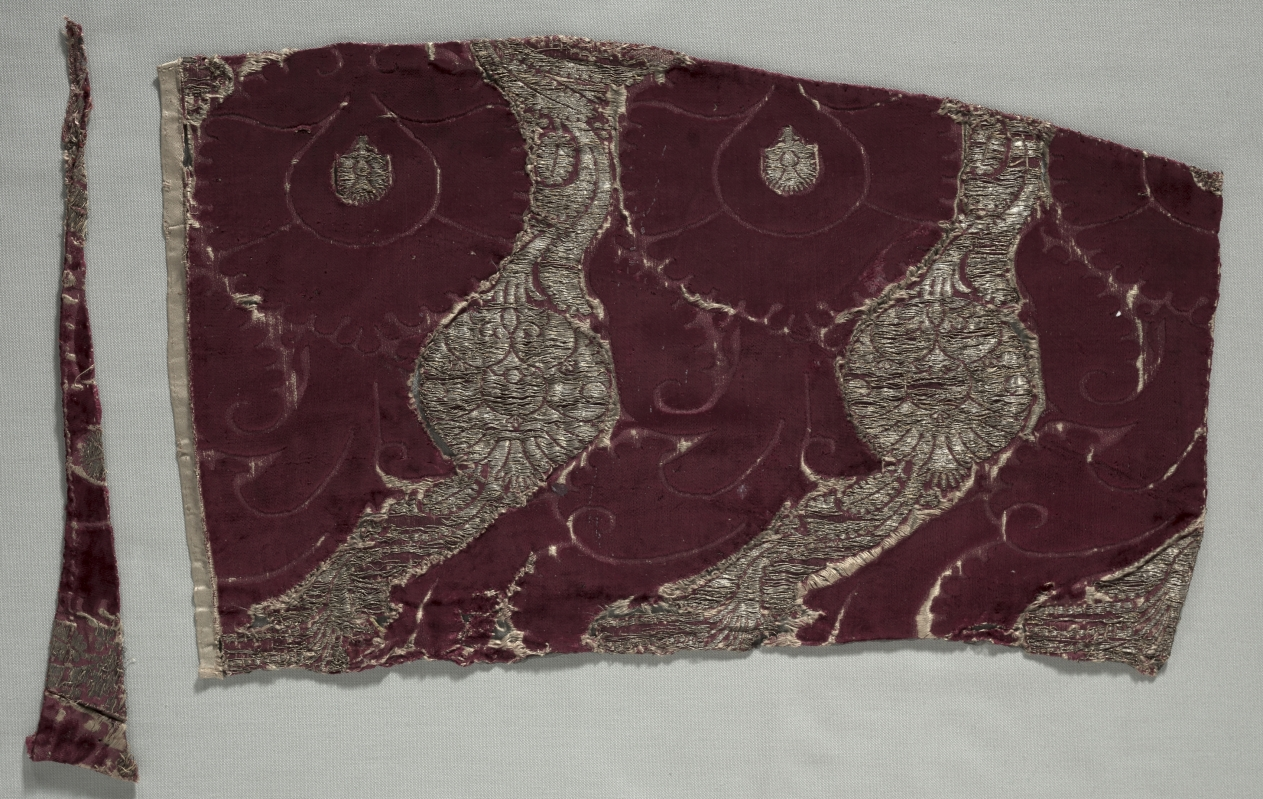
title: Velvet Fragment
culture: Italy, 15th century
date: 1400s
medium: velvet (cut, voided, and brocaded): silk and gold thread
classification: Velvet